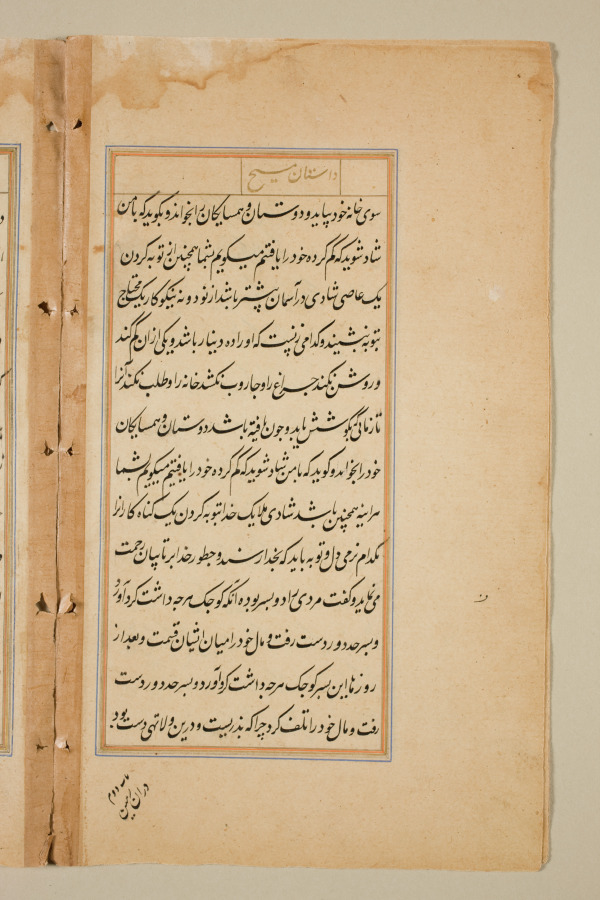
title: Text page from a Mirror of Holiness (Mir’at al-quds) of Father Jerome Xavier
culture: Mughal India, Allahabad, made for Prince Salim (1569–1627)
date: 1602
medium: Ink and gold on paper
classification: Manuscript